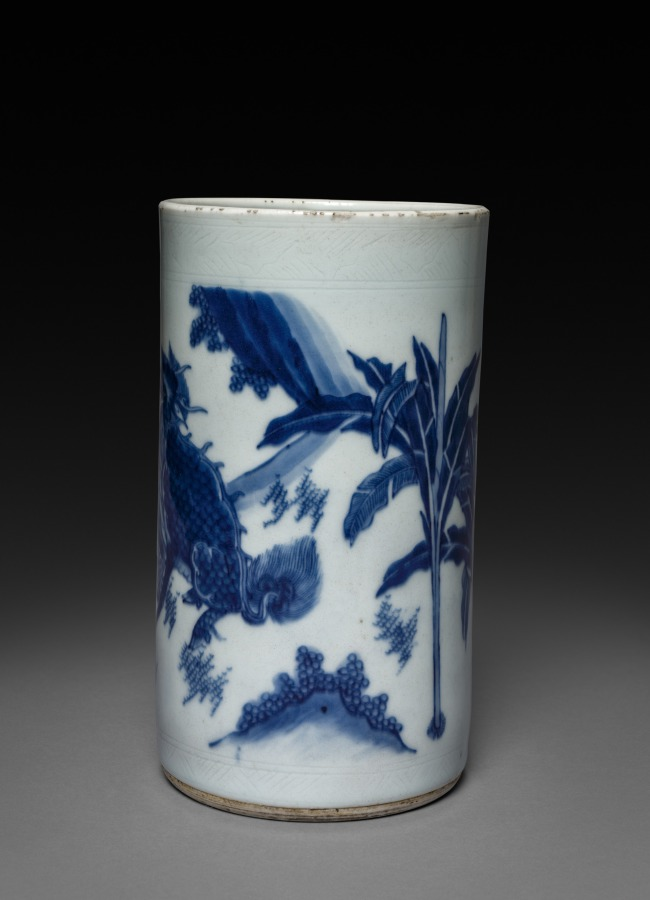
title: Brush Holder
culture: China, Jiangxi Province, Jingdezhen kilns, "Transitional period," Ming dynasty (1368–1644), Chongzhen reign (1628–1644)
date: 1628–44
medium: porcelain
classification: Ceramic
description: This porcelain brush holder is considered to have been made in the "Transitional period," a term used to define the period between about 1620 and 1683 when official kilns in Jingdezhen were no longer under imperial supervision due to the transition from the Ming to the Qing dynasties.